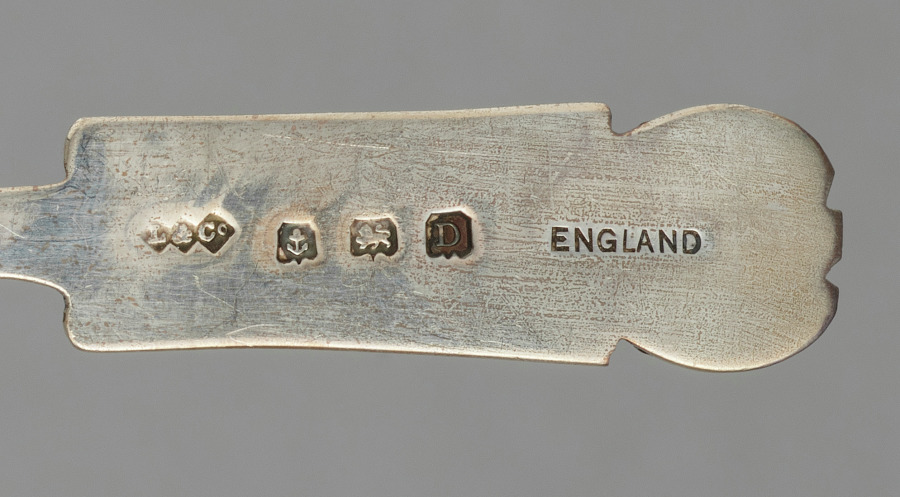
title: Set of six Spoons in Original Box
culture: England, London, 19th century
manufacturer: Liberty and Company (British)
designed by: attributed to Archibald Knox (British, 1864–1933)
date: c. 1895–1910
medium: Silver, enamel decoration and leather box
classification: Silver